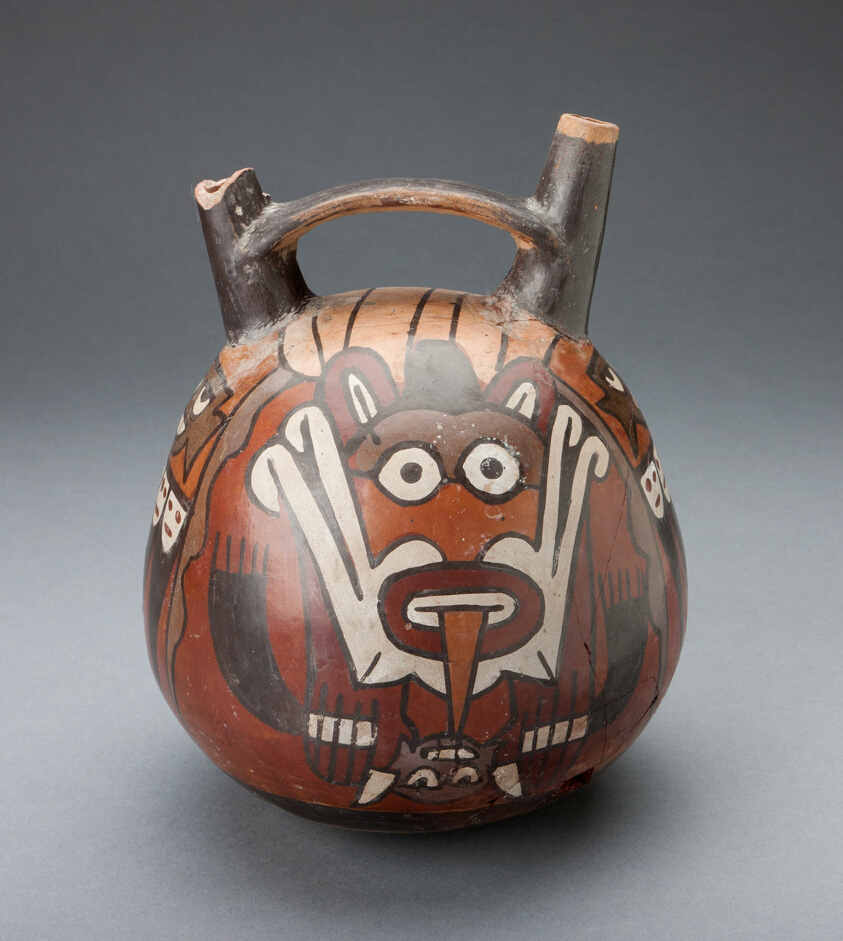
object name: Vessel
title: Vessel Depicting a Masked Ritual Performer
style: nazca, early intermediate period, Pre-Columbian, americas, Arts of the Americas, andean, andes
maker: Nazca; South coast, Peru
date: 180 BCE–500 CE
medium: Ceramic and pigment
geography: Nazca Valley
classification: earthenware; art of the americas; ceramics; vessel